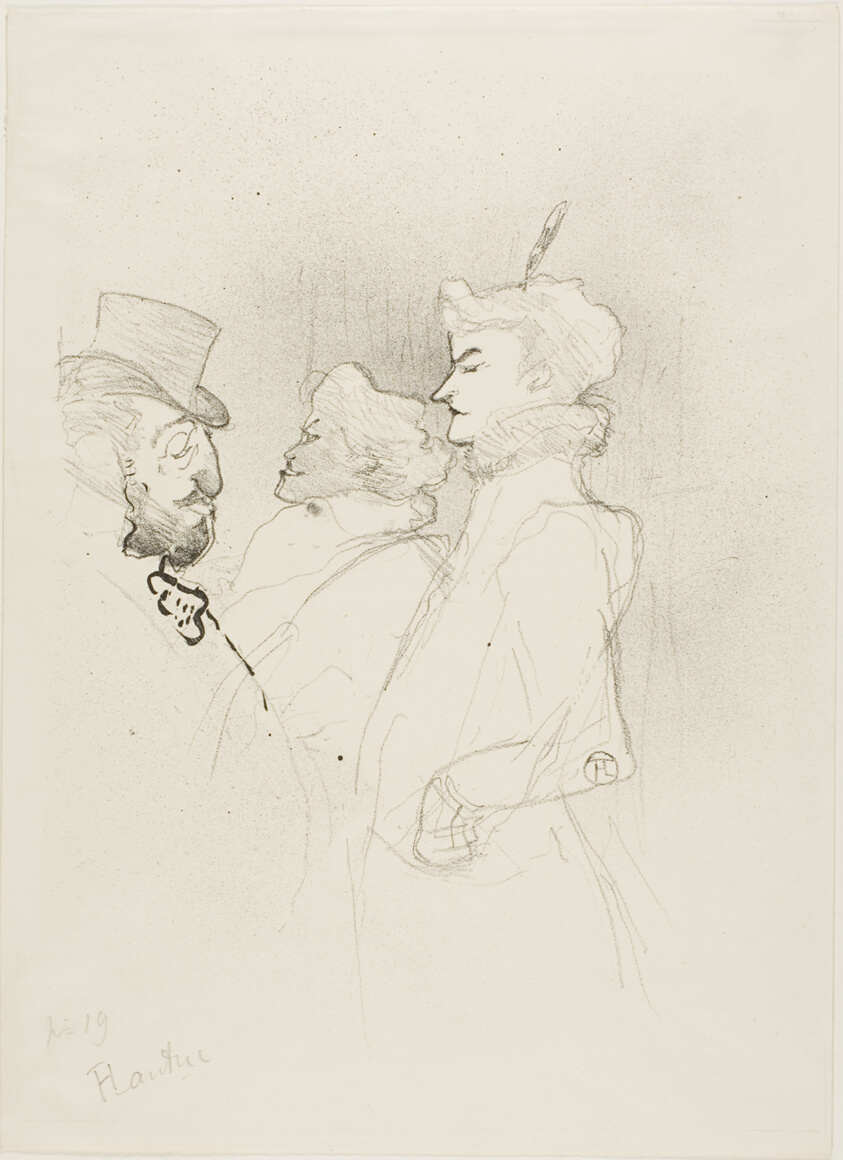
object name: Print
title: Why Not?... Once Does Not Count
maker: Henri de Toulouse-Lautrec (French, 1864-1901)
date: 1893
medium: Lithograph on cream wove paper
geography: France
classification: lithograph; print; prints and drawing